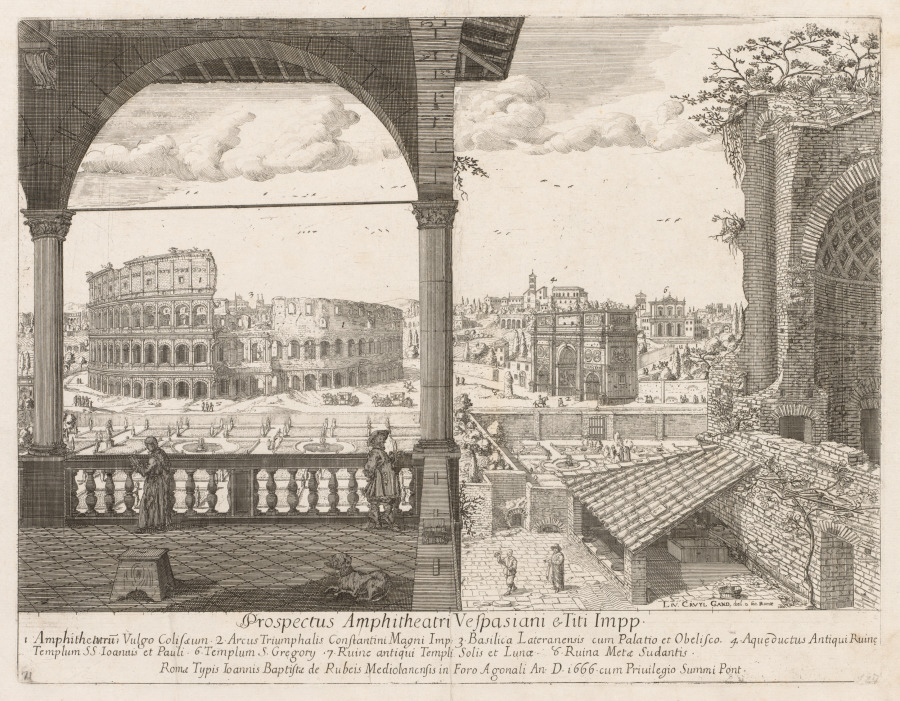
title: Il Colosseo e l'Arco di Costantino from "Prospectus Locurum Urbis Romae Insign[ium]"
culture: Flanders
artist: Lievin Cruyl (Flemish, c. 1640-c. 1720)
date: 1666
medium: etching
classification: Print